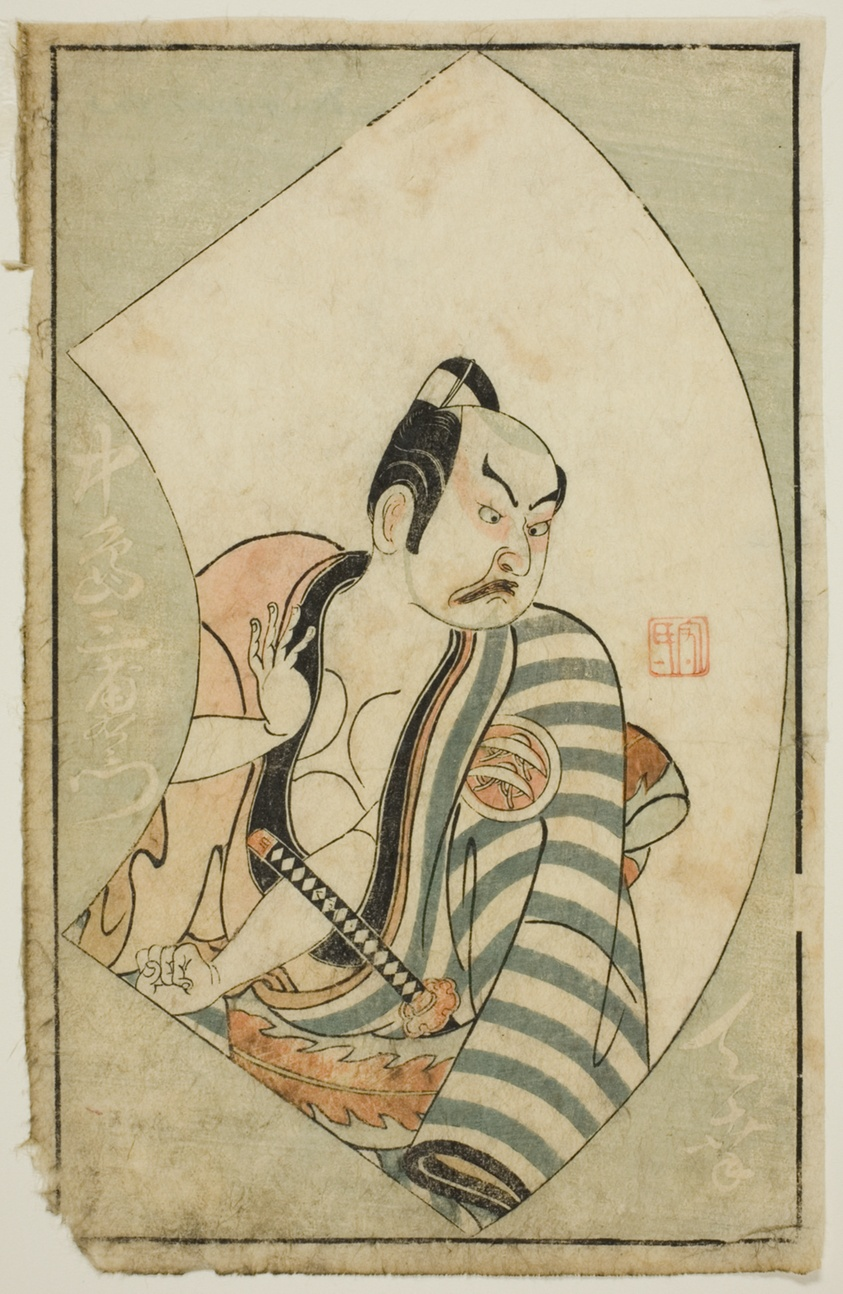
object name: Print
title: The Actor Nakajima Mioemon II, from "A Picture Book of Stage Fans (Ehon butai ogi)"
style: Japanese (culture or style)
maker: Ippitsusai Buncho (Japanese, active c. 1755-90)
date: 1770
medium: Color woodblock print; page from illustrated book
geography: Japan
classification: woodblock print; print; asian art